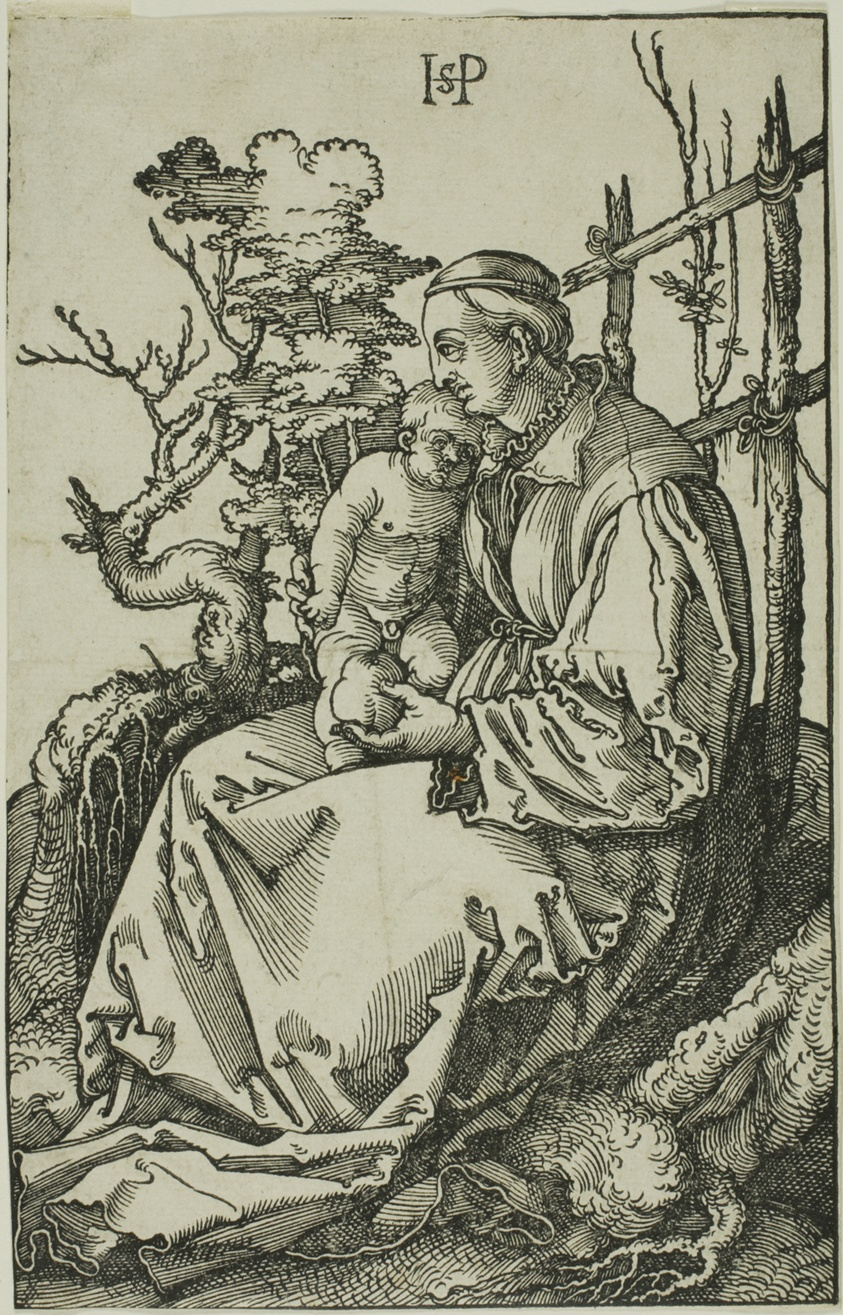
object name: Print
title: The Virgin with the Pear and Child on the Bank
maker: Sebald Beham; German, 1500-1550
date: 1521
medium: Woodcut in black on cream laid paper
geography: Germany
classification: woodcut; print; prints and drawing